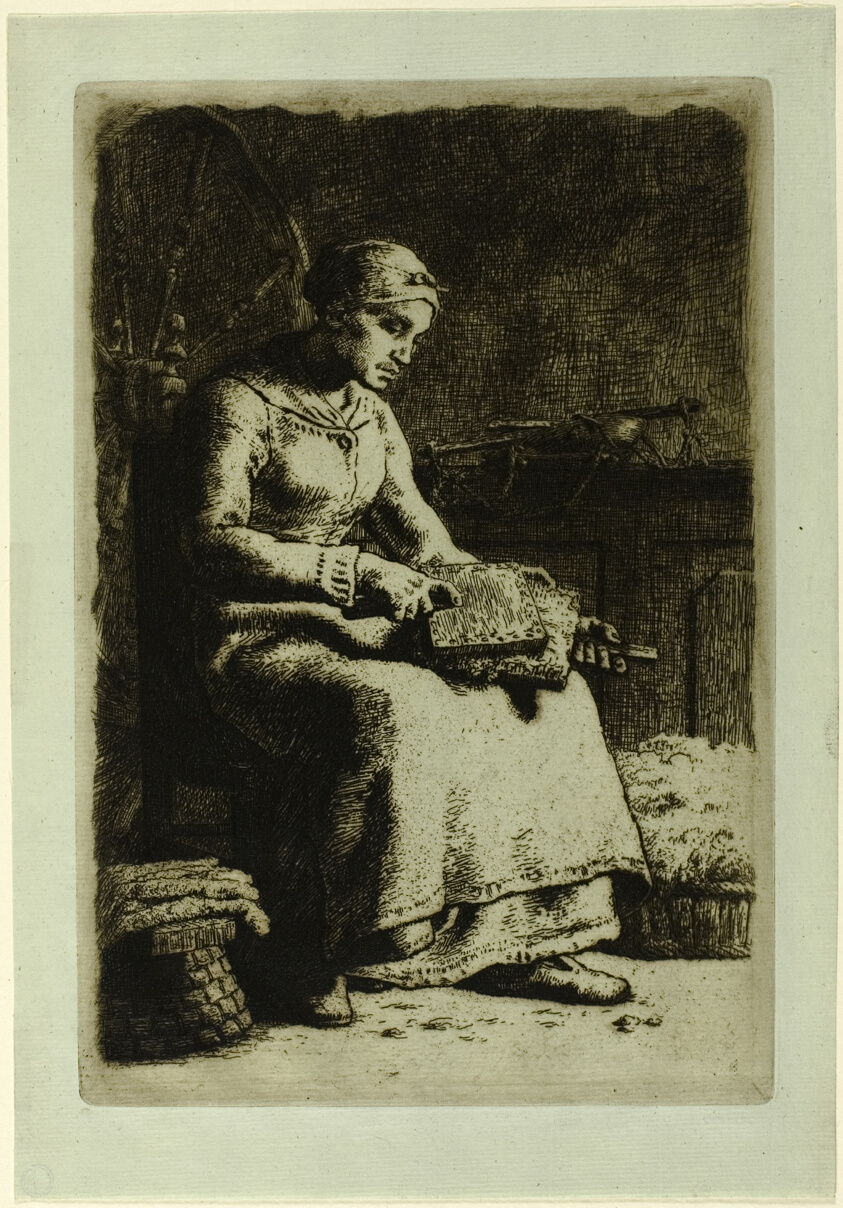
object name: Print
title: The Wool-Carder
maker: Jean François Millet (French, 1814-1875)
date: 1855–56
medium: Etching on bluish-green laid paper hinged on left side to ivory card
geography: France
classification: etching; print; prints and drawing